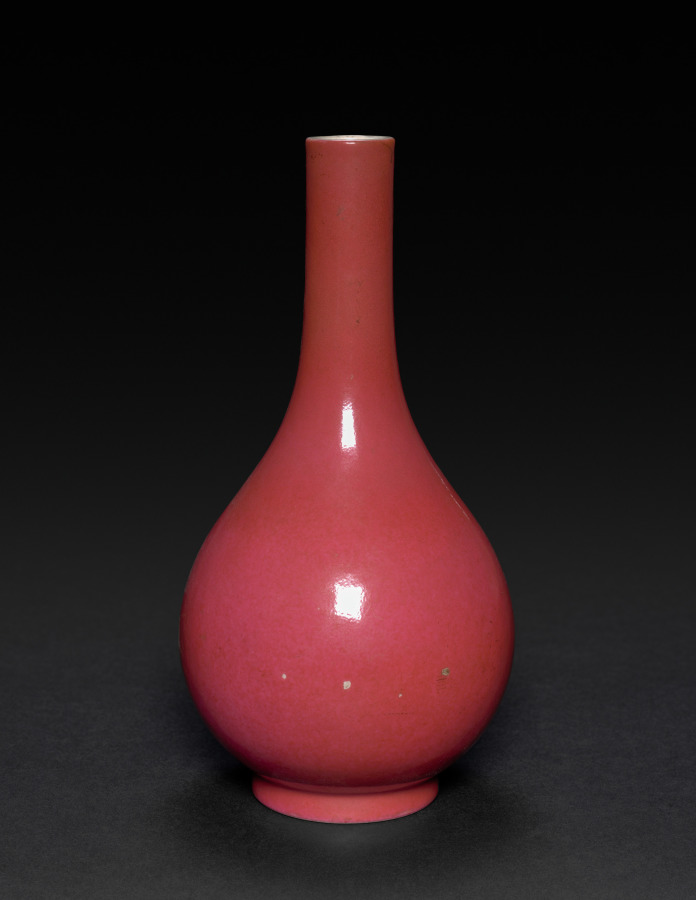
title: Vase with Pear-Shaped Body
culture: China, Qing dynasty (1644-1911)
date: 1644–1911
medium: porcelain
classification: Ceramic